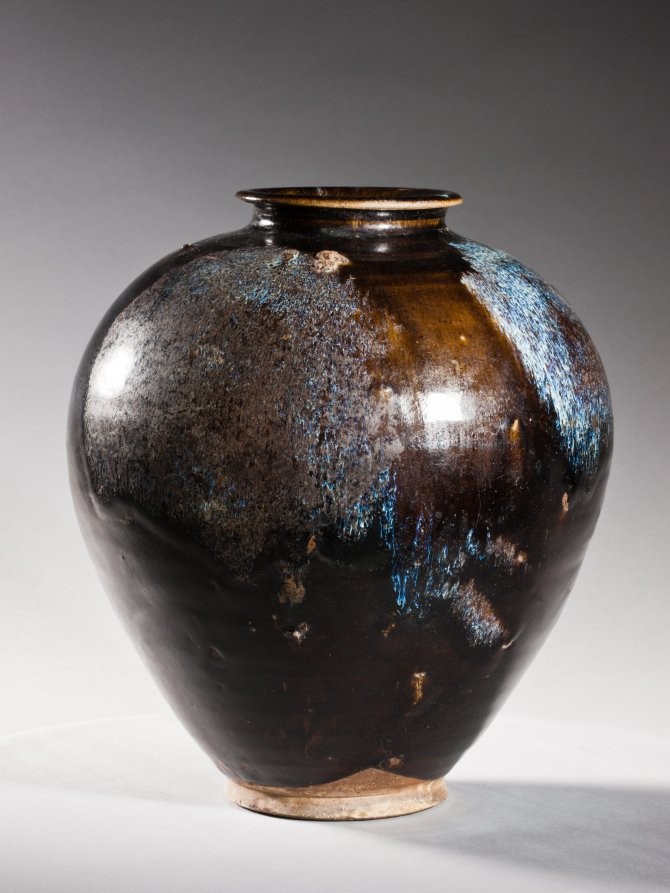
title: Jar: Black Ware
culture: China, Henan province, Huangdao kilns, Tang dynasty (618-907)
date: 700s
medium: glazed stoneware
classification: Ceramic